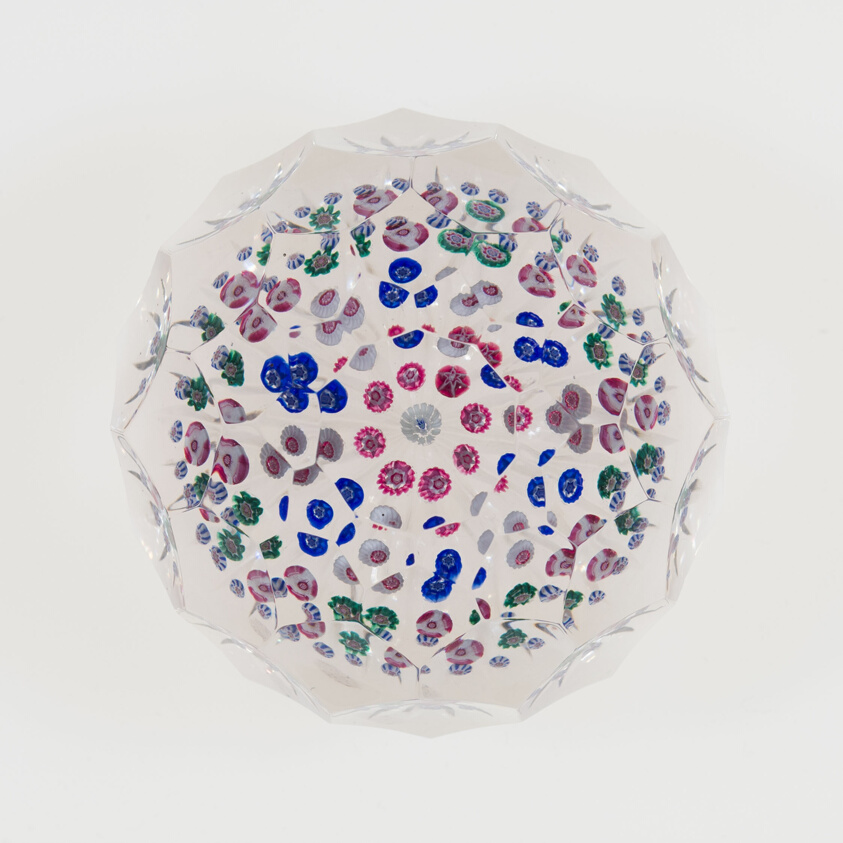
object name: Glass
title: Paperweight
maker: Clichy Glassworks (Cristalleries de Clichy); Clichy, France, 1837-1885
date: c. 1845/60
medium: Glass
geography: France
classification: paperweight; glass